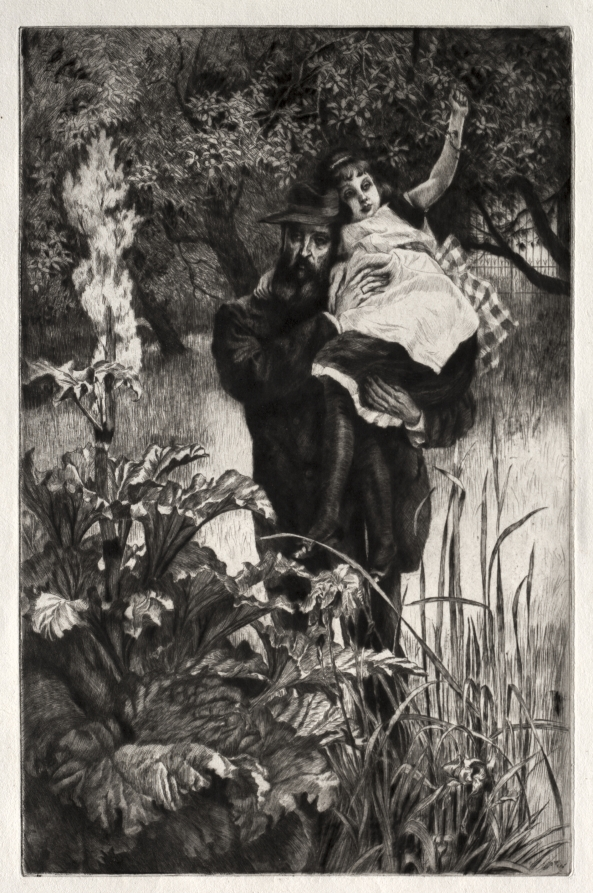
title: The Widower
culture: France, 19th century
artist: James Tissot (French, 1836–1902)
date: 1877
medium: etching and drypoint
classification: Print